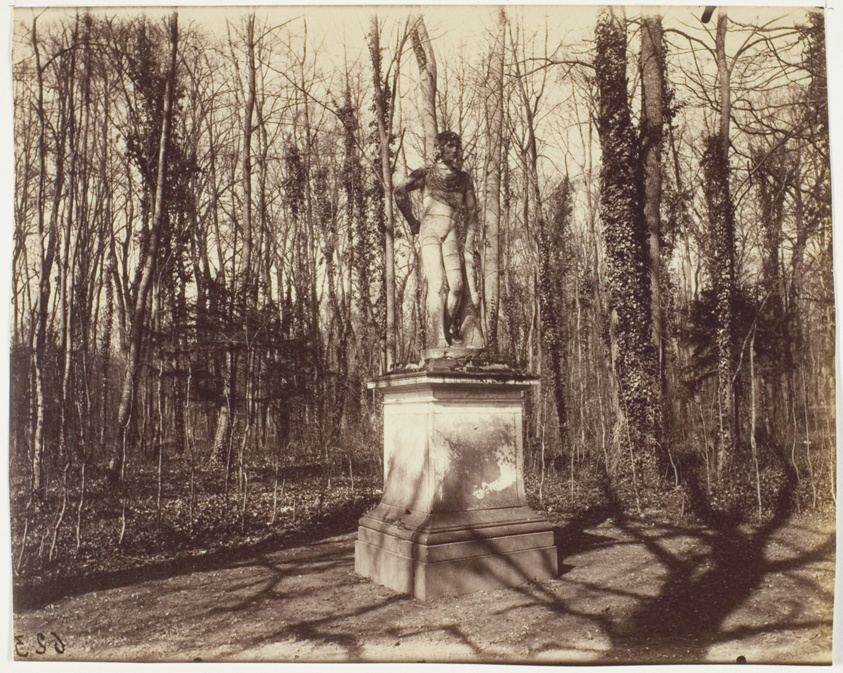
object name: Photograph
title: Versailles, Grand Trianon, Coin de Parc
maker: Jean-Eugène-Auguste Atget (French, 1857–1927)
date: 1901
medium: Albumen print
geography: France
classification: albumen silver print; photographic process; photography; photograph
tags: Collected by Hugh Edwards